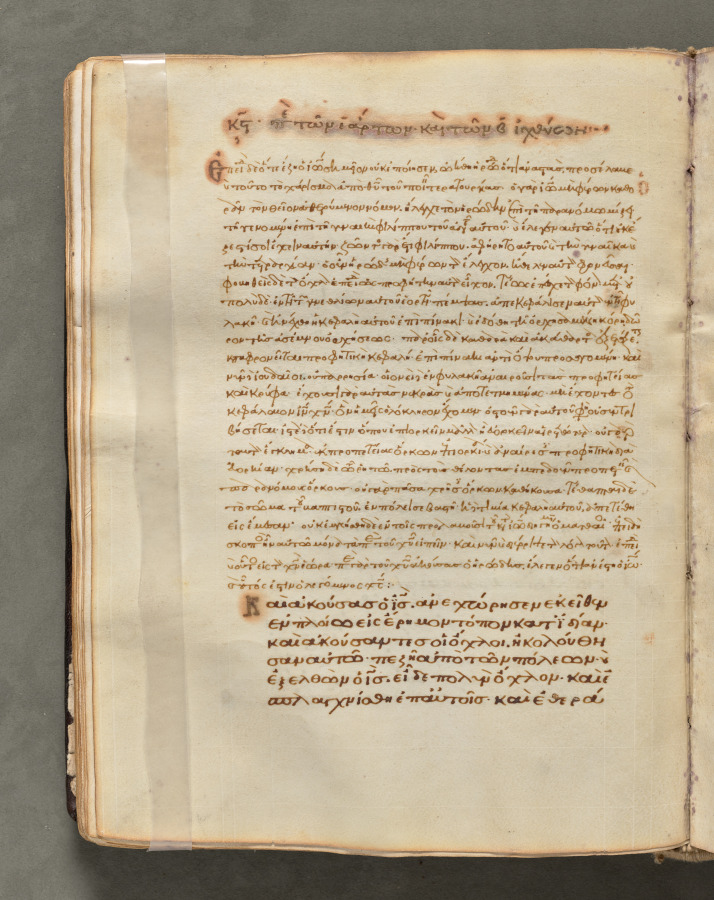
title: Text, folio 64 (verso), from a Gospel Book with Commentaries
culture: Byzantium, Constantinople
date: c. 1000–1100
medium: ink, tempera, and gold on vellum; leather binding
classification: Bound Volume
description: Each of the four gospels in this book opens on a page with brilliantly illuminated borders depicting the author of the text as well as birds-principally peacocks, symbols of the immortality of the soul-and fountains, representing the fountain of life and the salvation of the soul. This volume consists of 428 leaves with texts in Greek. Its level of sophistication suggests that it was probably written and decorated in a monastery in Constantinople.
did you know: Gospel Books were carried in procession through Byzantine churches.